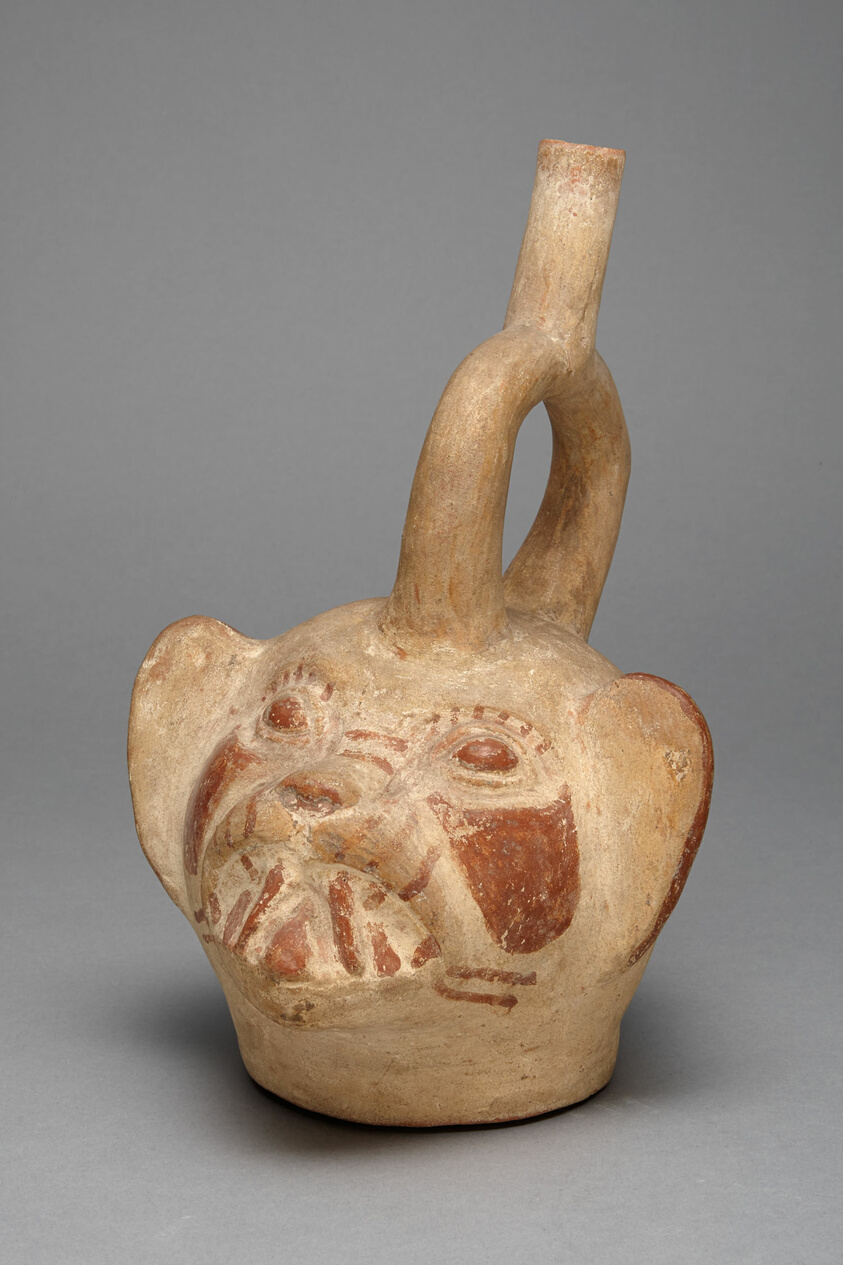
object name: Vessel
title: Stirrup Vessel in the Form of a Feline Head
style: moche, andes, Arts of the Americas, south american, andean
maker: Moche (Chimbote, Santa Valley, north coast, Peru)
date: 250–500 CE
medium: Ceramic and pigment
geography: Santa Valley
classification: earthenware; ceramics; vessel; art of the americas